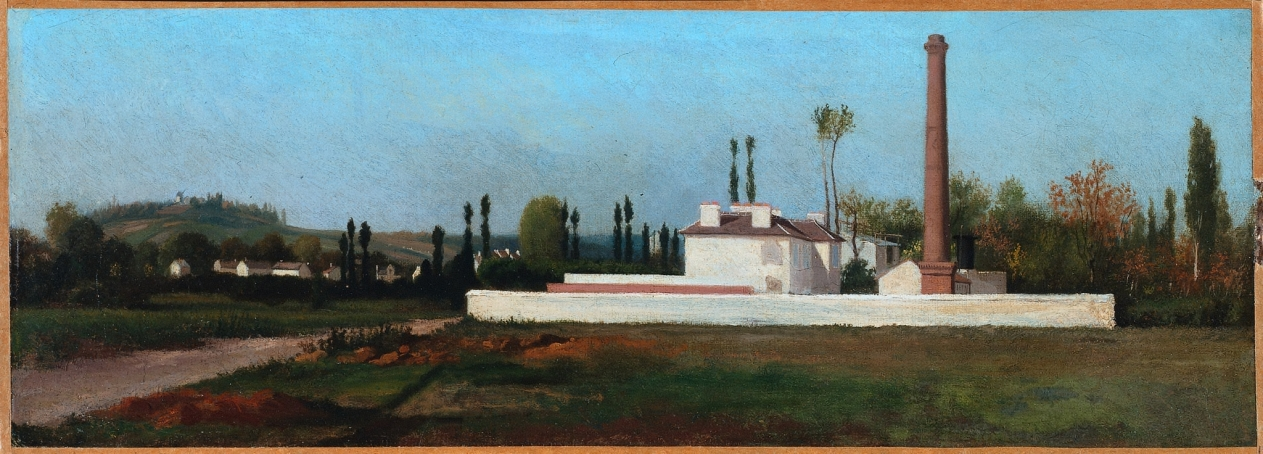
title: Industrial Plant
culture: France, 19th century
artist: Antoine Chintreuil (French, 1814–1873)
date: c. 1865–1870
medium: oil on fabric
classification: Painting